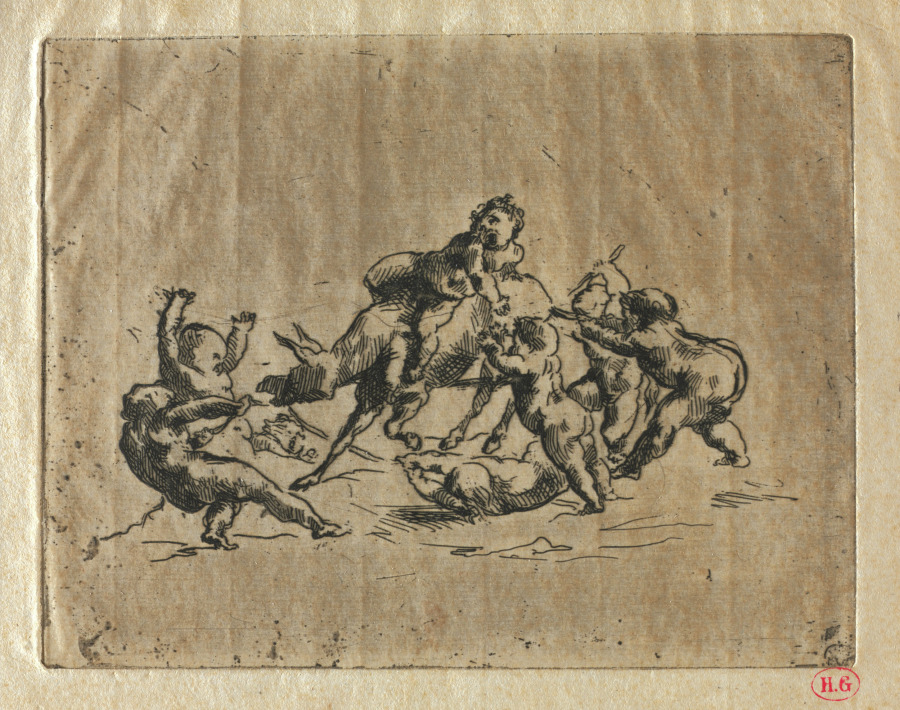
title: Bacchanal with Children and Donkey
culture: France, 19th century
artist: Jean-Baptiste Carpeaux (French, 1827–1875)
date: c. 1860–70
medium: etching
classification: Print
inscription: below the lower right platemark edge: stamp for Hector Giacomelli (Lugt 1311)